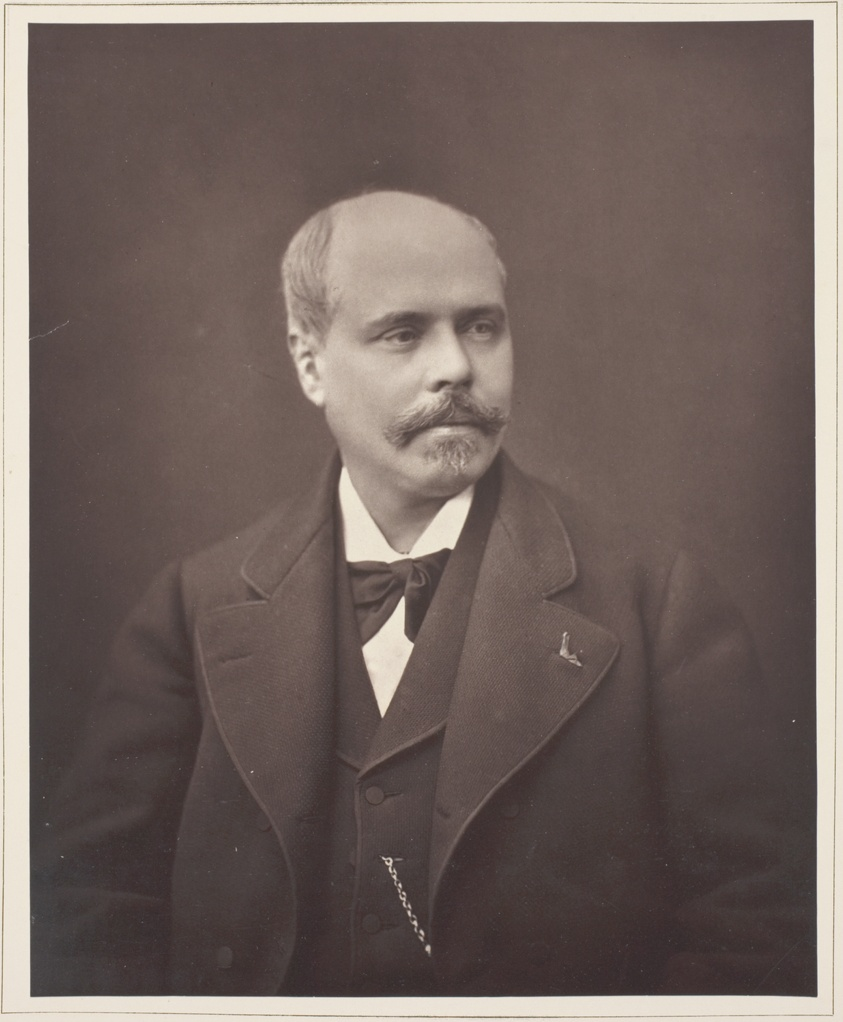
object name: Photograph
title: Aldophe Belot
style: 19th century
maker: Ferdinand J. Mulnier (French, active 1860–1890)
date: c. 1876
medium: Woodburytype, from the periodical “Galerie Contemporaine Littéraire, Artistique” (1879), volume 7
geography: France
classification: woodburytype; photomechanical process; photography; photograph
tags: Collected by Hugh Edwards, Contemporaine Littéraire